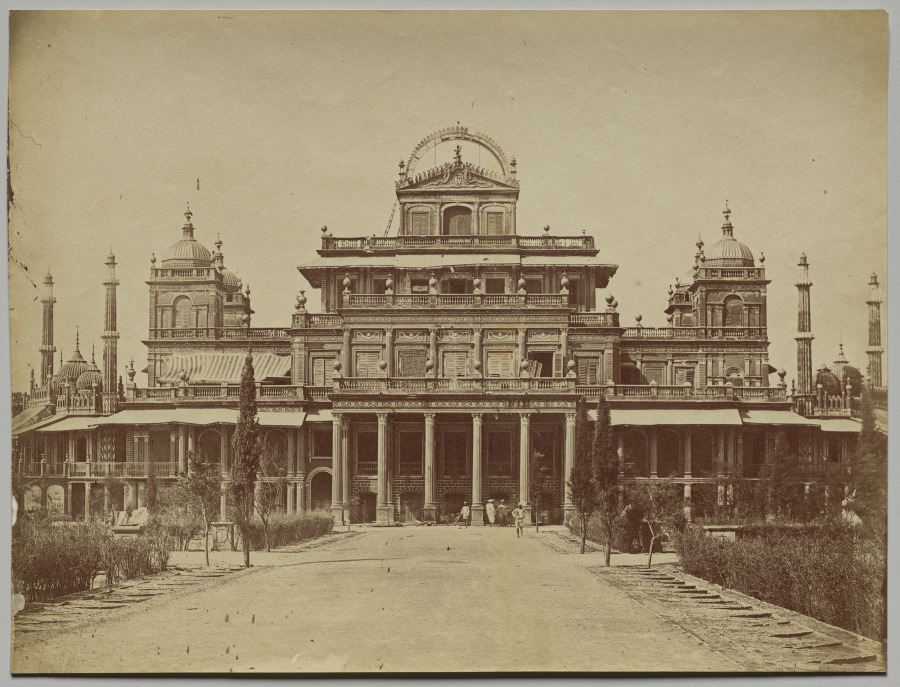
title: King's Palace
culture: England, 19th century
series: Lucknow After the Siege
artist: Felice A. Beato (British, 1832–1909)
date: 1858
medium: albumen print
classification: Photograph